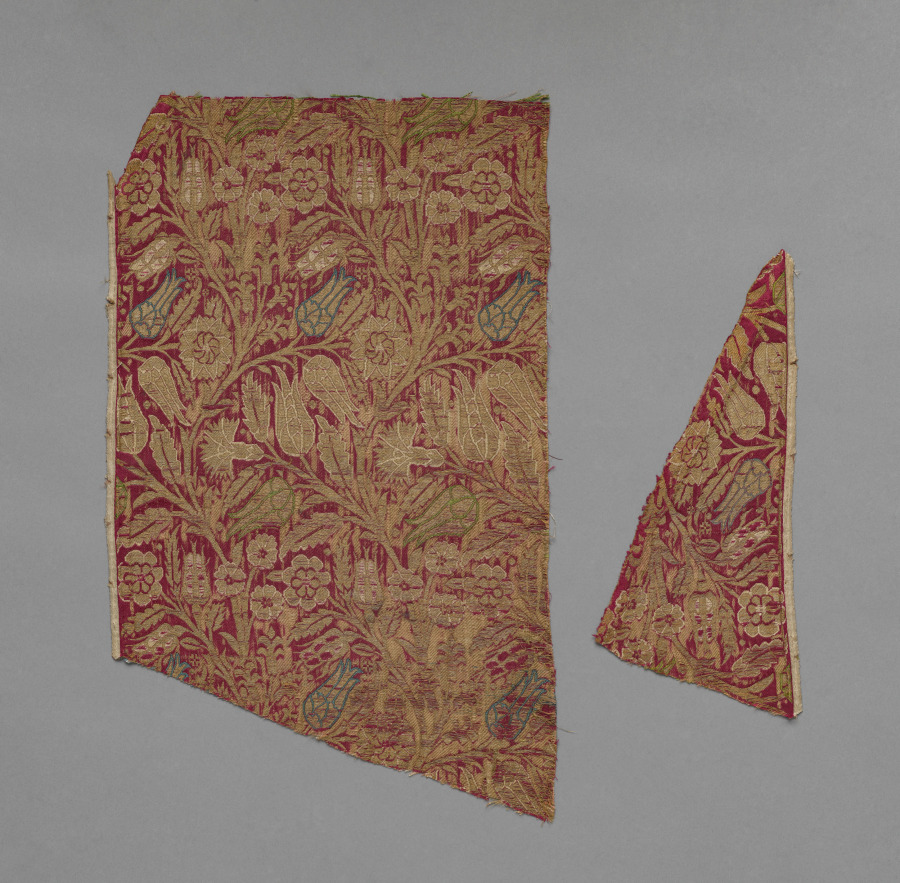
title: Textile Fragments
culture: Turkey, Bursa, 16th century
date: 16th century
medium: brocaded silk with metal thread weft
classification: Textile